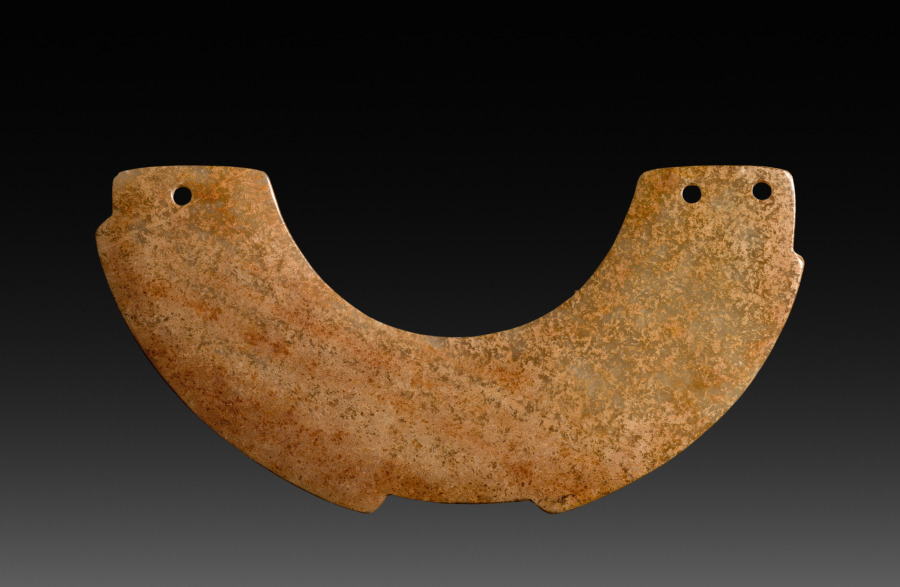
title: Semi-Circle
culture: China, Zhou dynasty (c. 1046–256 BCE)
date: 1045–256 BCE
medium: jade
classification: Jade